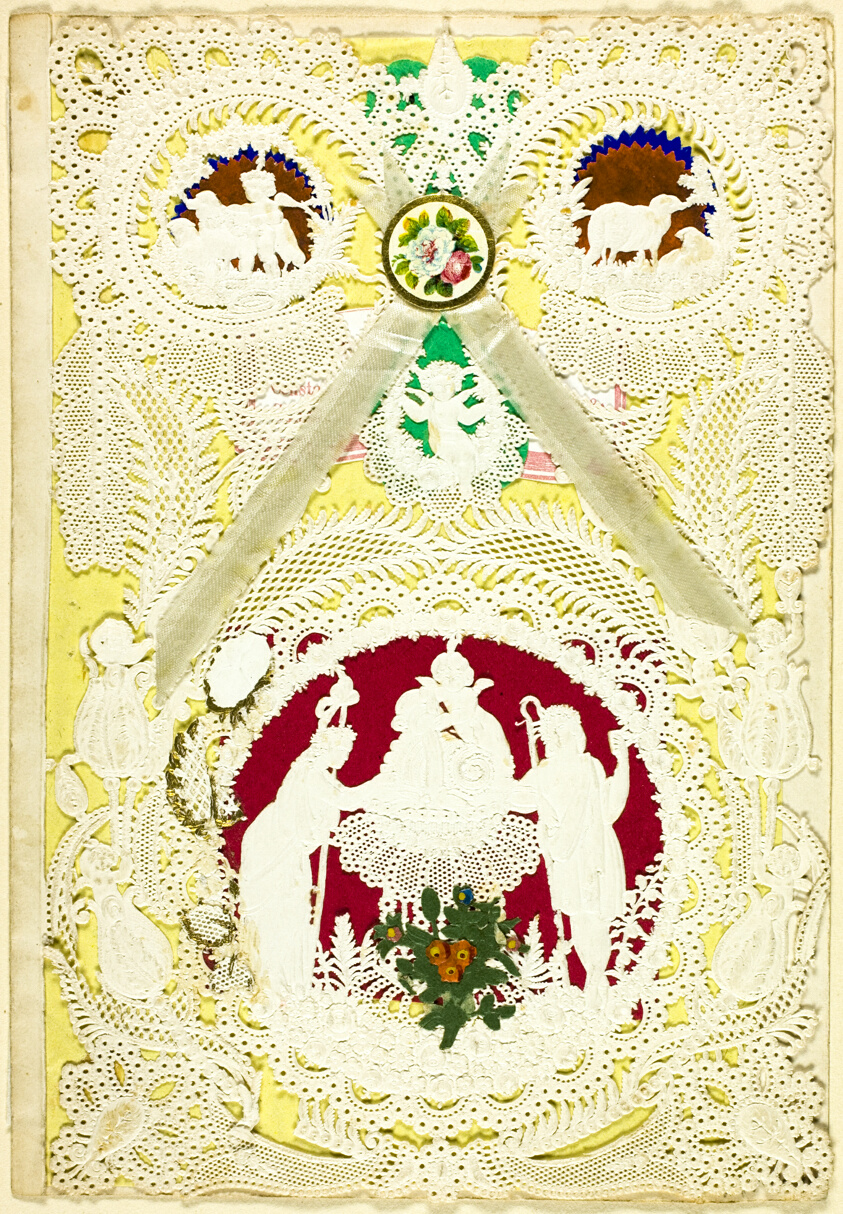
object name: Drawing and Watercolor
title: Constancy (valentine)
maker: Unknown Artist; English, 19th century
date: 1840/60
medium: Collaged elements with gold paint on cut and embossed ivory wove paper (lace, folded), with yellow wove paper insert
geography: England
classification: valentine; prints and drawing; paper